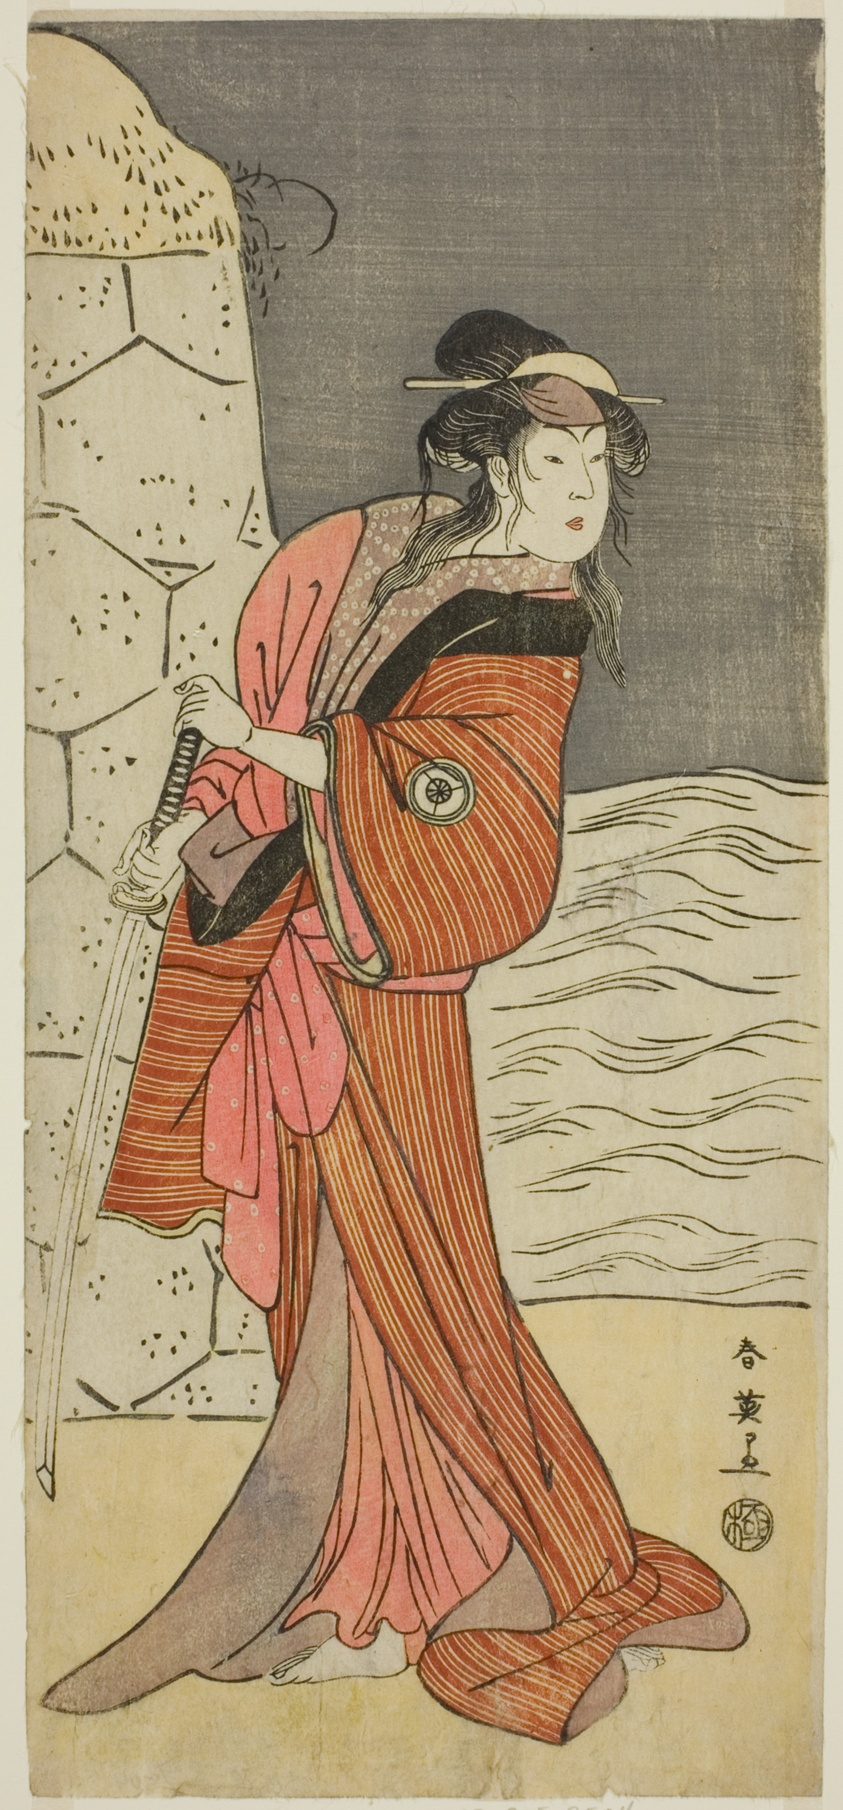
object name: Print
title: The Actor Iwai Hanshiro IV as Yaegushi no Oroku (?) in the Play Keisei Kogane no Hakarime (?), Performed at the Kawarazaki Theater (?) in the Third Month, 1792 (?)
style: Japanese (culture or style)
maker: Katsukawa Shun'ei (Japanese, 1762-1819)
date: c. 1792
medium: Color woodblock print; hosoban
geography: Japan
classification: woodblock print; print; asian art